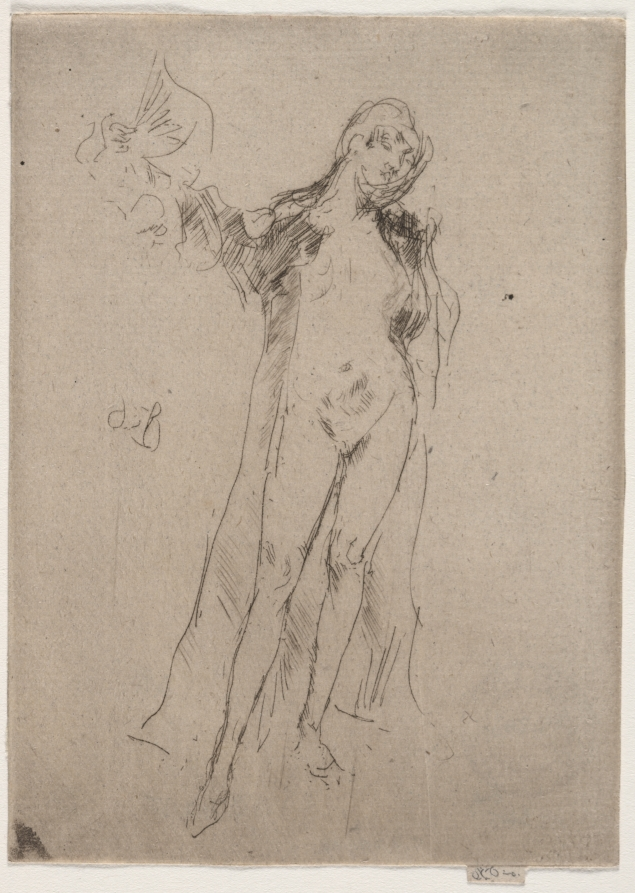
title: The Fan (Model No. 3)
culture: America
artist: James McNeill Whistler (American, 1834–1903)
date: 1887–88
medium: etching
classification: Print